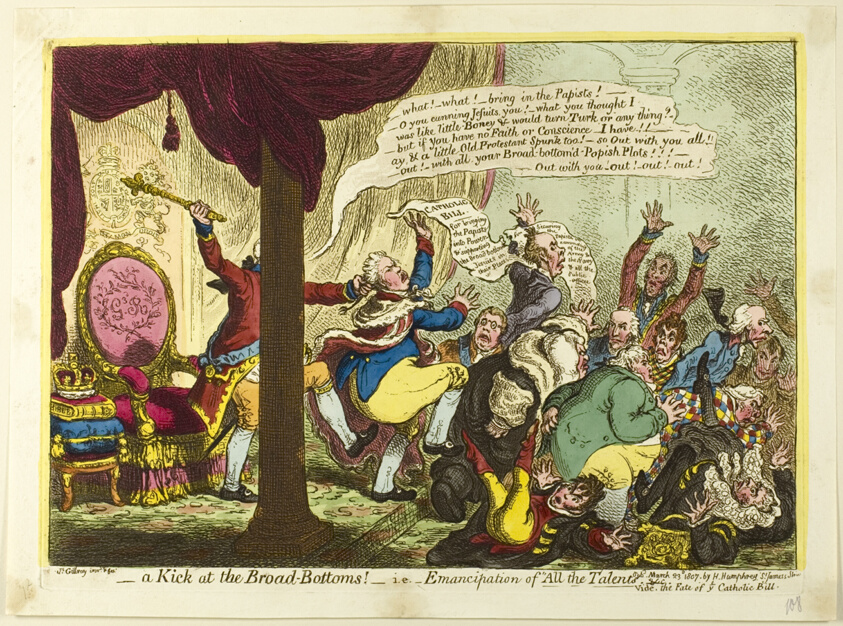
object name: Print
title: A Kick at the Broad Bottoms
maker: James Gillray (English, 1756-1815); published by Hannah Humphrey (English, c. 1745-1818)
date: published March 23, 1807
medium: Hand-colored etching, slightly aquatinted on paper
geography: England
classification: etching; print; prints and drawing